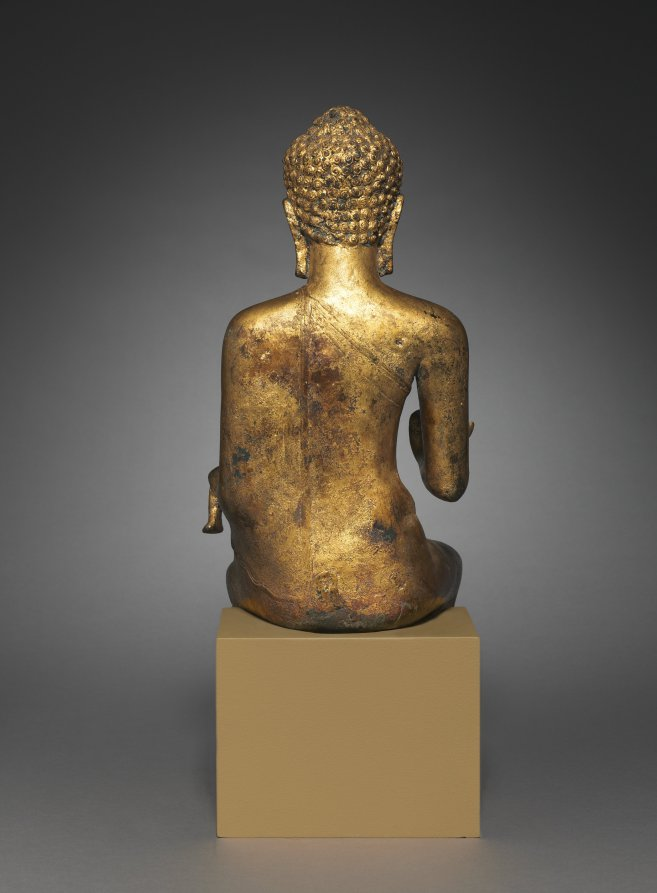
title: Enthroned Buddha Preaching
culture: Myanmar or Thailand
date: 700s–800s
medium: copper alloy with gilding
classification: Sculpture